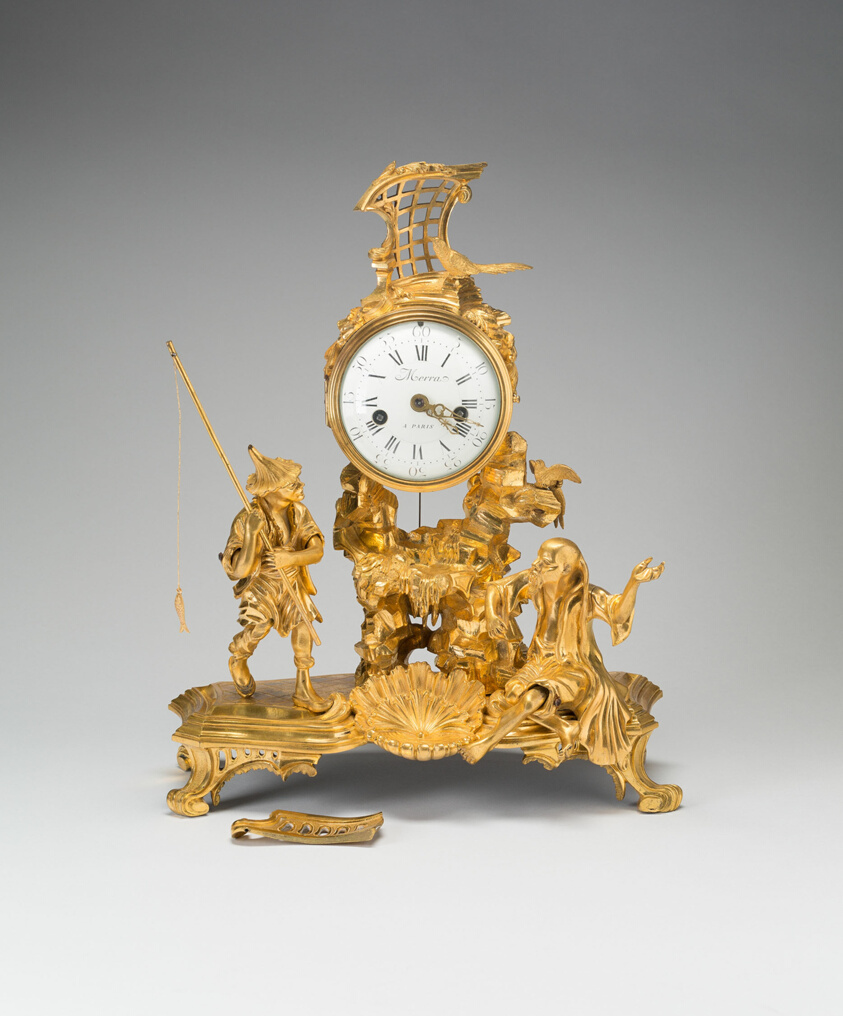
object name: Metalwork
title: Clock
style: louis xv, european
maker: Pierre Martin Merra; Franco-Flemish, active 1761; Paris, France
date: c. 1775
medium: Gilt bronze and enamel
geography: France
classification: clock; furniture; european decorative arts; metalwork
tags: furniture